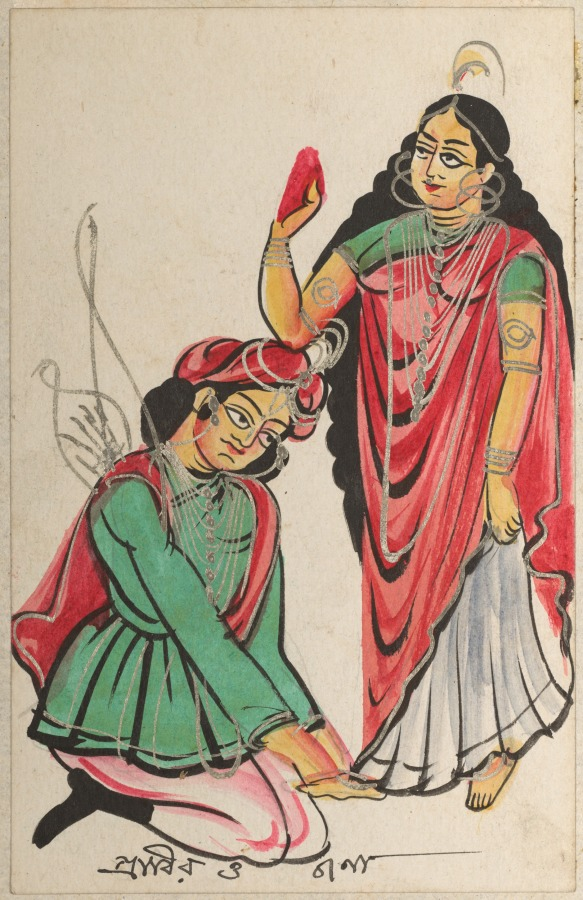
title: Pravira Kneeling at the Feet of Jana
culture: Eastern India, Bengal, Kolkata, Kalighat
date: c. 1890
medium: Gum tempera, graphite, ink, and tin on paper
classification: Painting